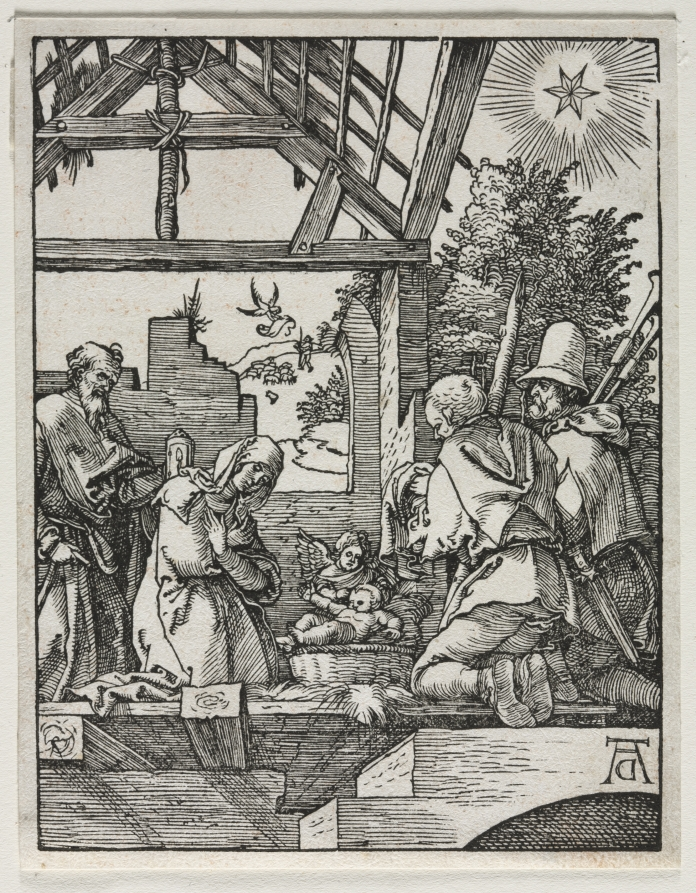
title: The Small Passion: The Nativity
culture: Germany, late 15th-early 16th century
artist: Albrecht Dürer (German, 1471–1528)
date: c. 1509–10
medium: woodcut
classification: Print